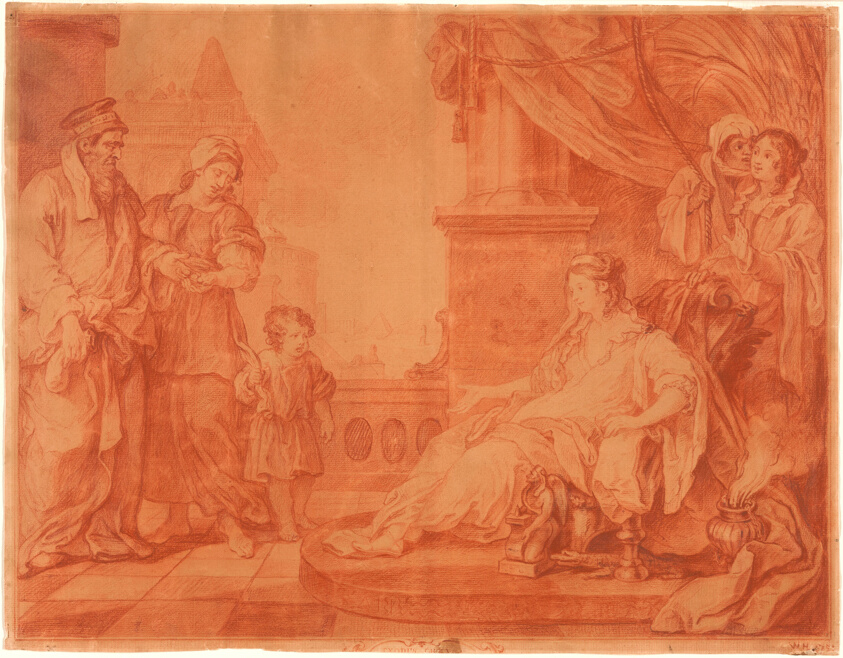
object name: Drawing and Watercolor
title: Moses Brought to Pharaoh’s Daughter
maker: William Hogarth (English, 1697–1764)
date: 1751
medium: Various red chalks (one oxidized to black) on cream laid paper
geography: England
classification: prints and drawing; chalk; drawings (visual works)